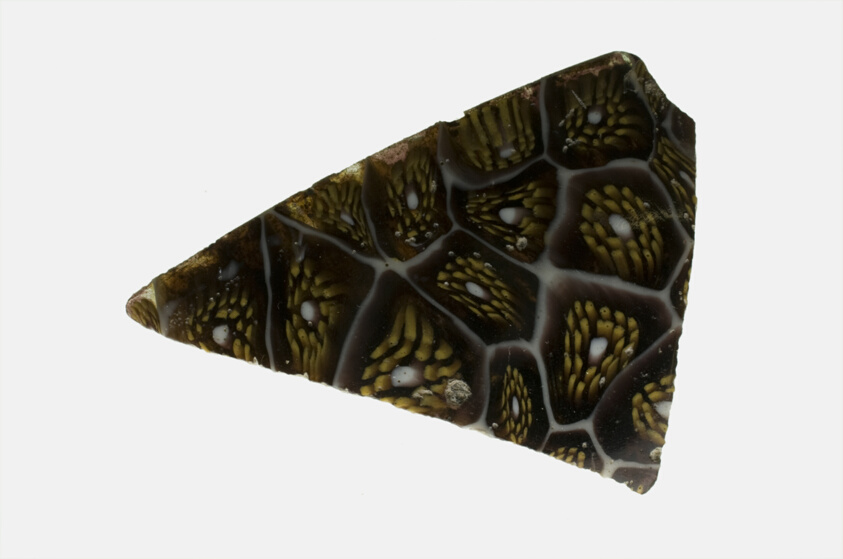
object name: Decorative Arts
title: Fragment of a Bowl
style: roman (ancient, style or period), ancient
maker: Roman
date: 1st century BCE–1st century CE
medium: Glass, mosaic glass technique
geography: Roman Empire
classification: fragment; decorative arts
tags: decoration